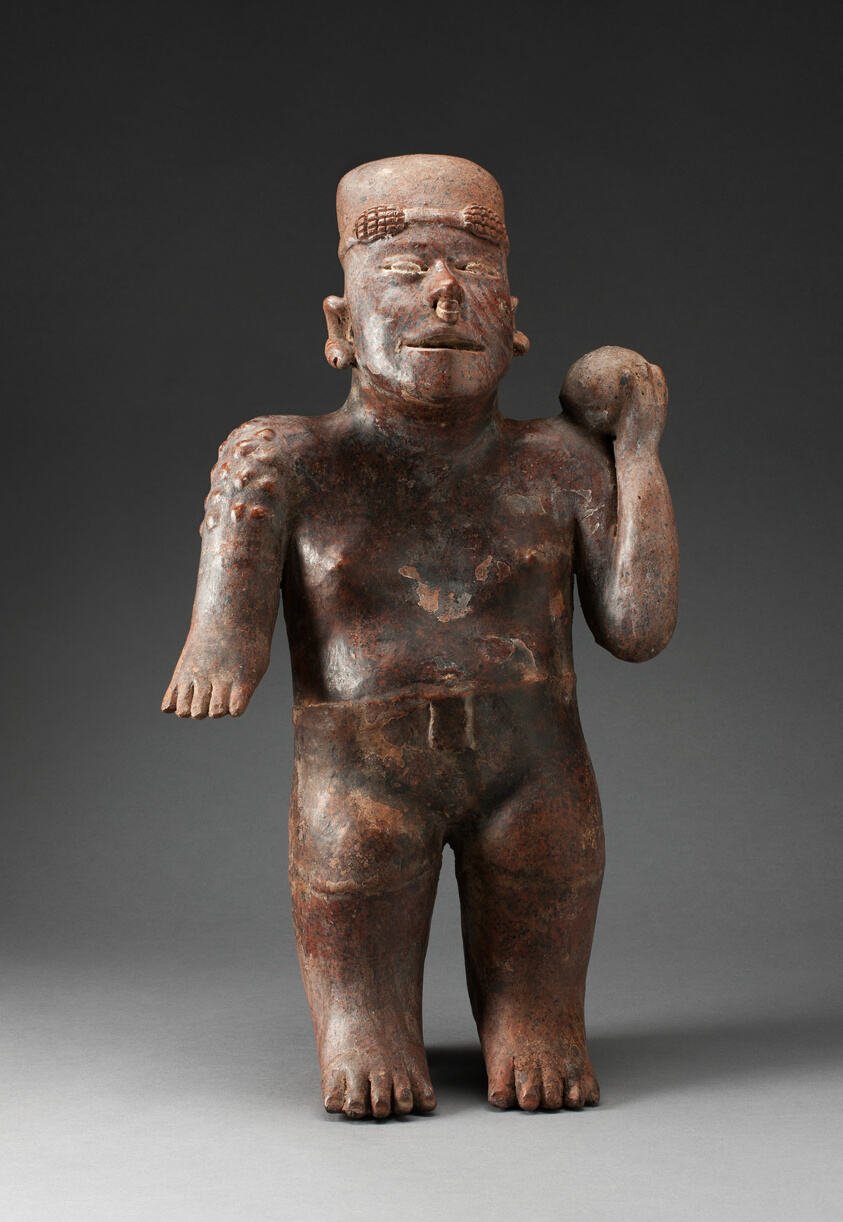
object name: Sculpture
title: Standing Male Figure Holding a Ball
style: jalisco, mesoamerican, Pre-Columbian, americas, Arts of the Americas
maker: Jalisco, Ameca-Etzatlán; Jalisco, Mexico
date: 100 BCE–300 CE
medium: Ceramic and pigment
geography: Jalisco state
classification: earthenware; art of the americas; ceramics; sculpture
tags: people